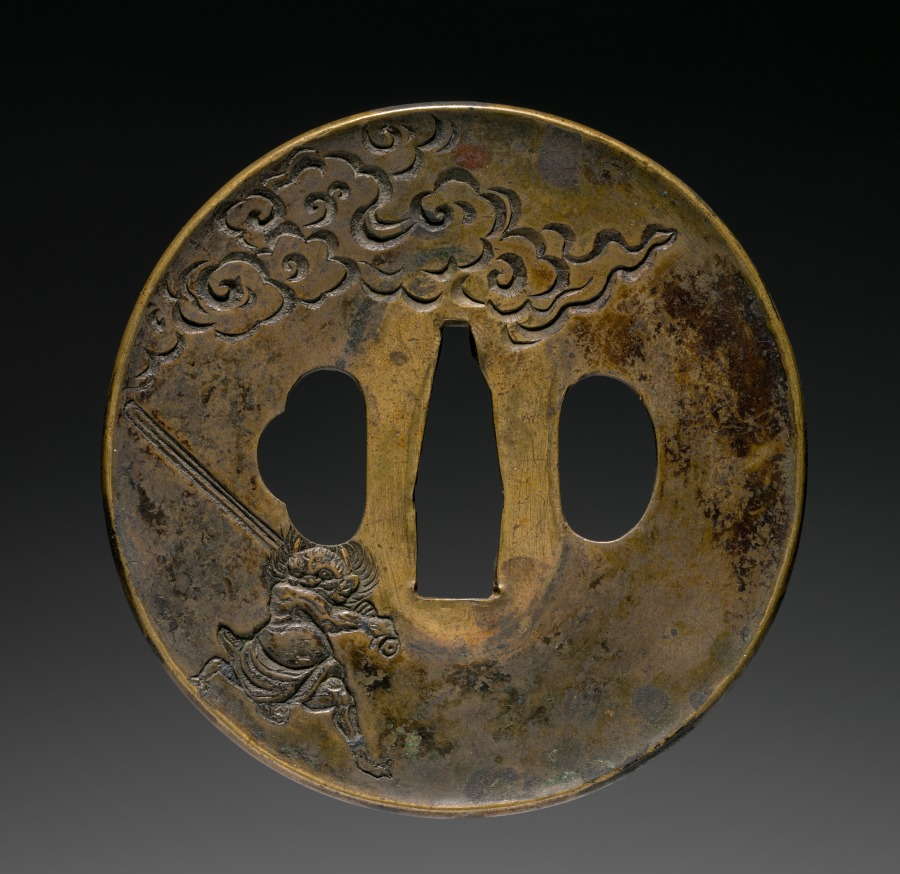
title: Sword Guard (Tsuba) with Zhong Kui (Shōki) the Demon Queller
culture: Japan, possibly Edo period (1615-1868)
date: c. 1615–1868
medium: brass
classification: Arms and Armor